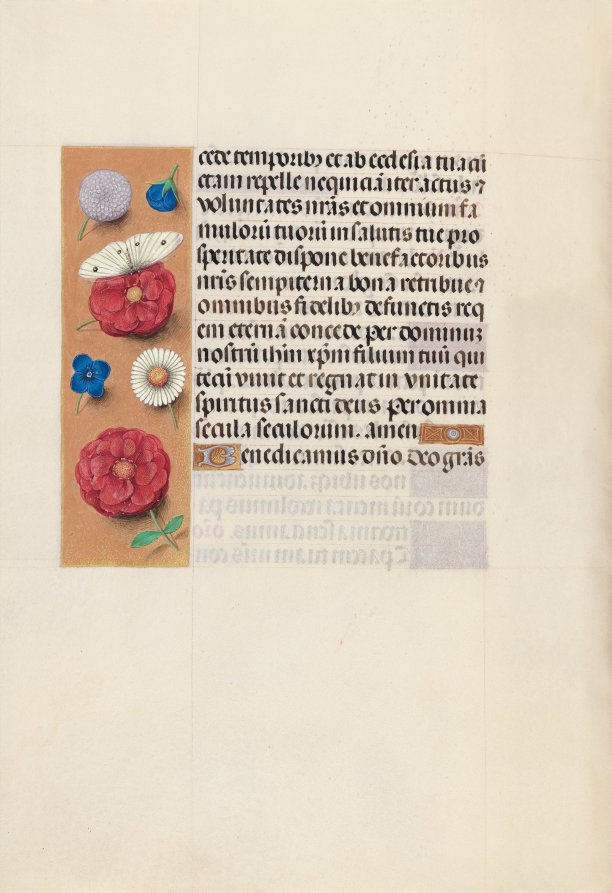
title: Hours of Queen Isabella the Catholic, Queen of Spain: Fol. 130v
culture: Flanders, Ghent and Bruges, late 15th century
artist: Master of the First Prayerbook of Maximillian (Flemish, c. 1444–1519)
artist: and Associates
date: c. 1500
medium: ink, tempera, and gold on vellum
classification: Bound Volume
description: This manuscript was illuminated by a circle of at least five highly organized manuscript painters active in the Flemish cities of Ghent and Bruges. The principal illuminator was Alexander Bening, who painted the majority of the book's miniatures. Manuscripts produced by this circle of artists are renowned for the decoration of their borders, which typically feature a rich variety of realistically-painted flowers, birds, and butterflies. This prayer book, called a book of hours, was intended not for a cleric, but for the private devotions of a lay person-in this case, Isabella the Catholic, Queen of Spain (1451-1504). Isabella's coat of arms embellishes the book's frontispiece. It is unlikely that the book was commissioned by the Queen herself; rather, she probably received it as a diplomatic gift from someone courting her patronage, perhaps Cardinal Francisco Jimenez de Cisneros. A Franciscan friar, Jimenez was dependent upon Isabella for his advancement, first to the post of Queen's confessor in 1492, and then to Archbishop of Toledo in 1495.